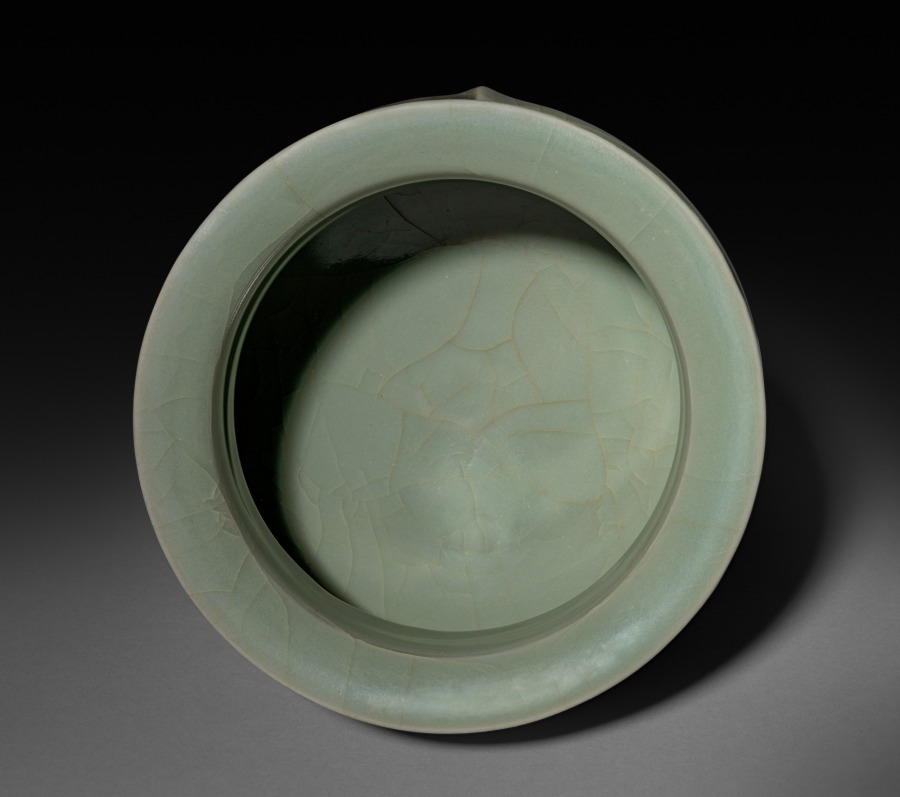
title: Incense Burner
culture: China, Southern Song dynasty (1127-1279)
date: 960–1279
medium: glazed porcelain, Longquan ware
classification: Ceramic